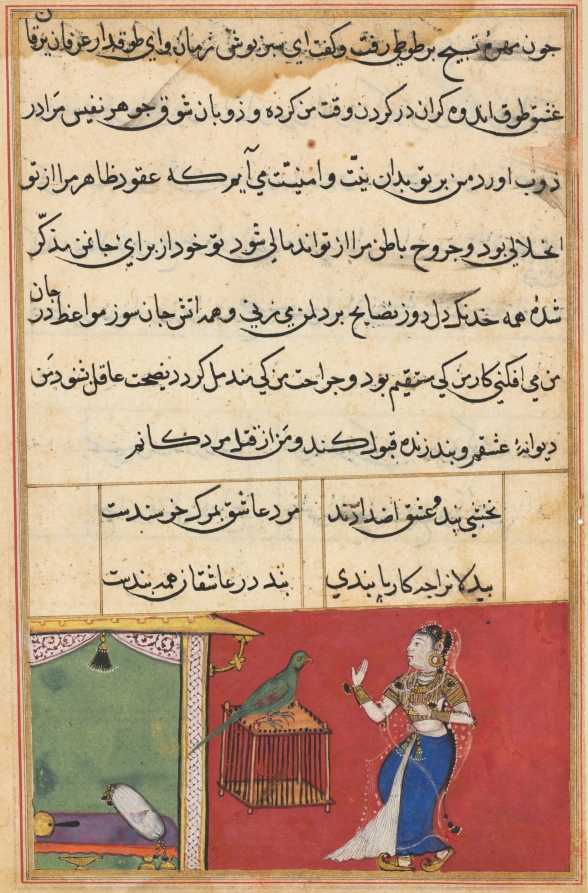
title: The parrot addresses Khujasta at the beginning of the forty-seventh night, from a Tuti-nama (Tales of a Parrot): Forty-seventh Night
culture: Mughal India, court of Akbar (reigned 1556–1605)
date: c. 1560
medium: gum tempera, ink, and gold on paper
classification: Painting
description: Against a brightly colored red and green background, Khujasta meets with Tuti the talking parrot. In order to keep her from leaving to visit her lover, the parrot tells Khujasta a moralizing story about four friends who were given magical shells by a wise man.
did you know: The flat planes of bold color were favored by Indian artists before the time of Akbar.